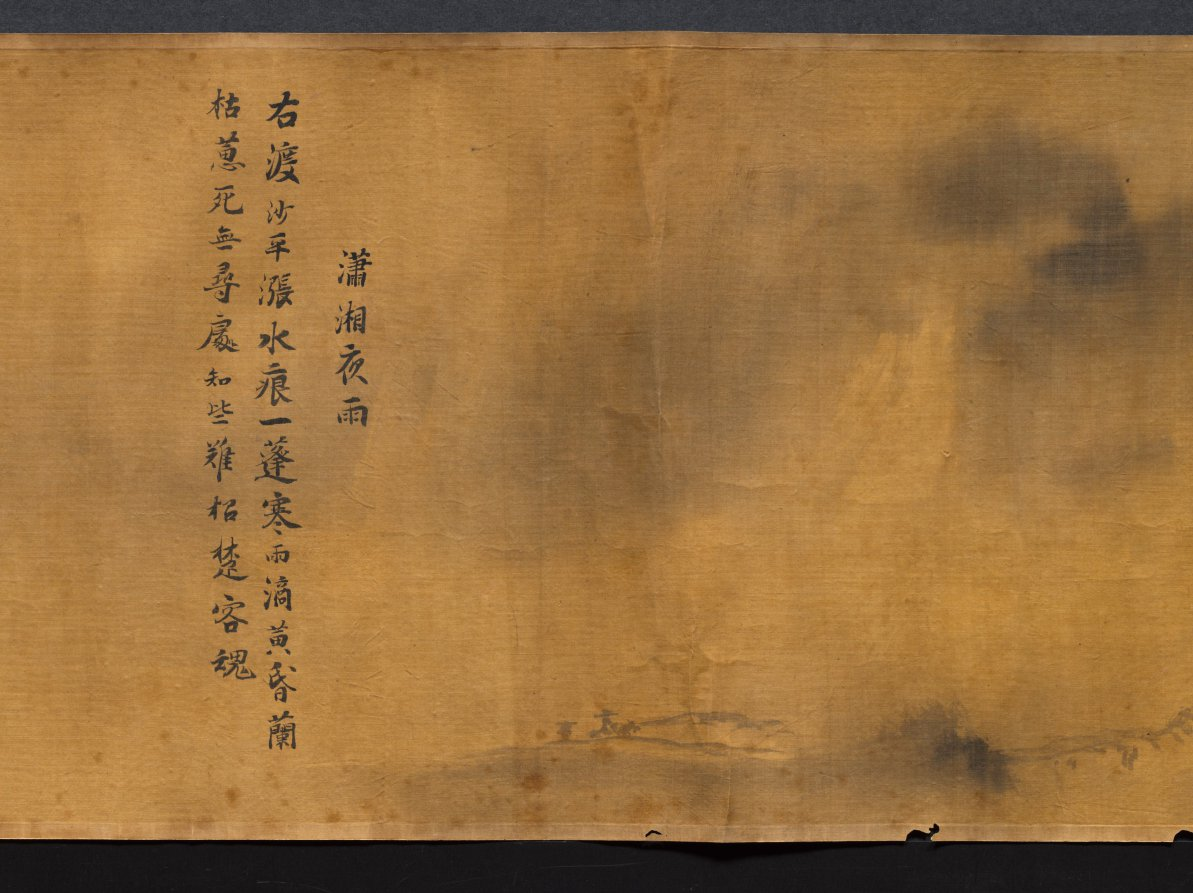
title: Eight Views of Xiao-Xiang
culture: Japan, Edo period (1615–1868)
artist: Kano Tan’yū (Japanese, 1602–1674)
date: 1615–1868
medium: handscroll; ink on silk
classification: Painting